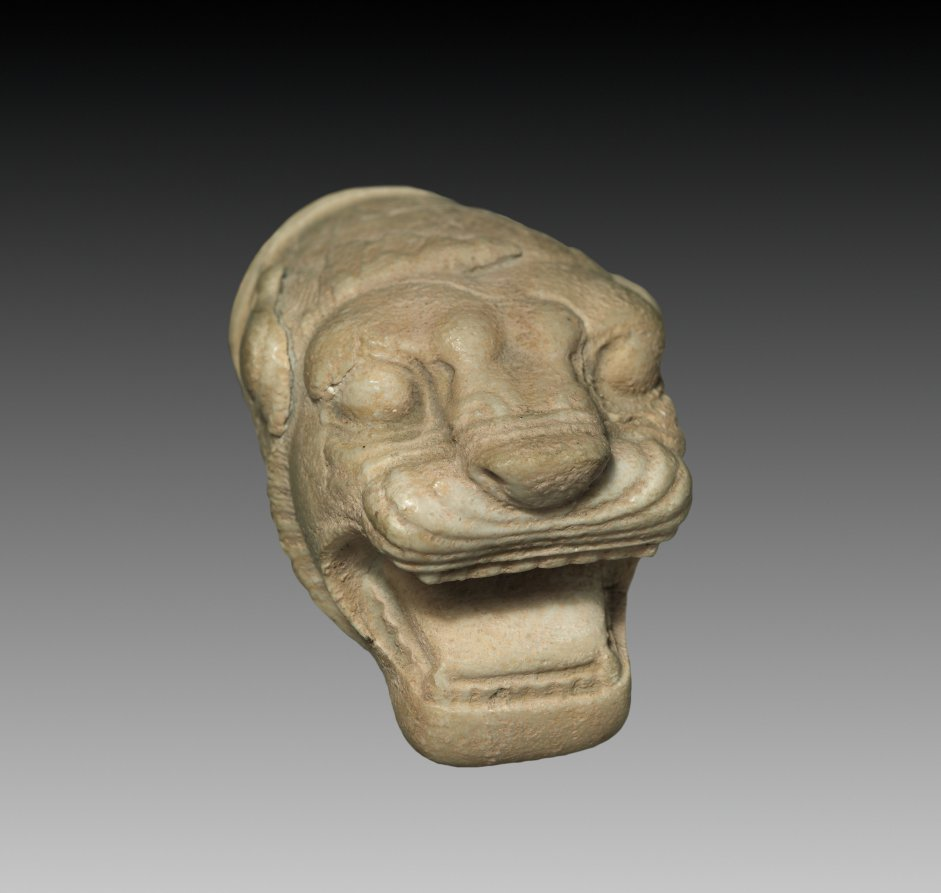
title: Lion's Head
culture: Iran, Achaemenid (550–330 BCE)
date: 500s BCE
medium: marble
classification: Sculpture